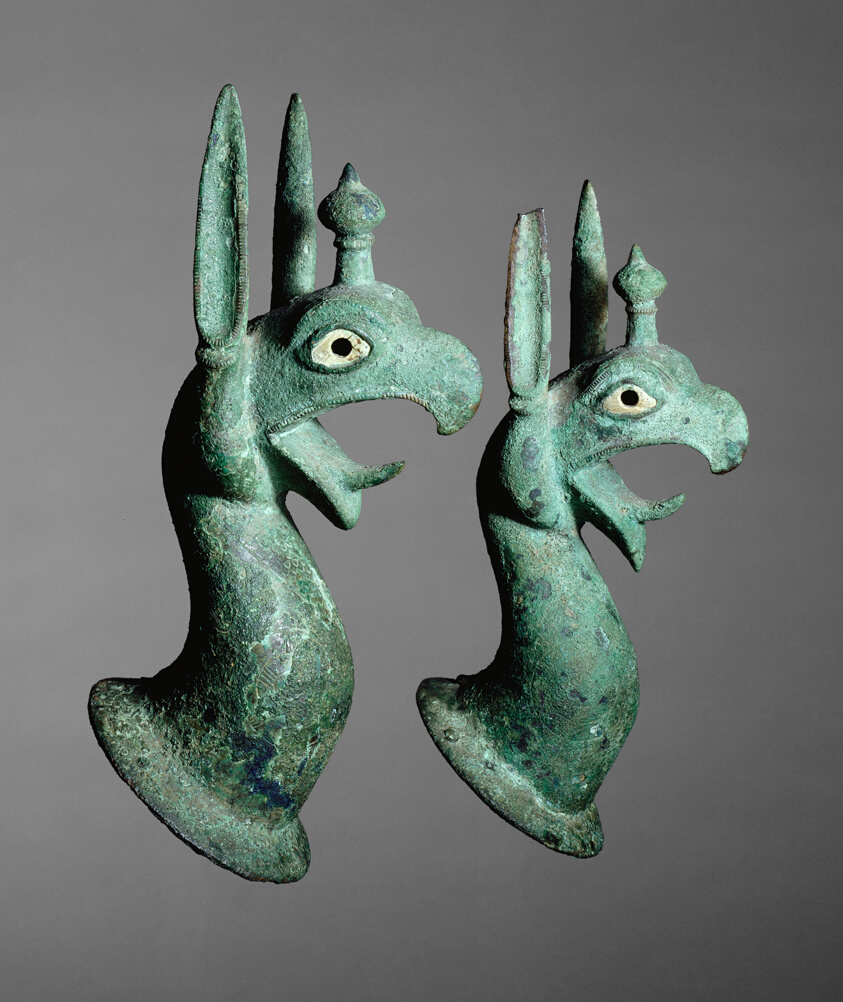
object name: Sculpture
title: Pair of Protomes Depicting the Forepart of a Griffin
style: orientalizing, ancient, greek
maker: Greek; probably Samos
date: 625-575 BCE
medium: Bronze with bone or ivory inlay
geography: Sámos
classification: sculpture; bronze; metal; ancient art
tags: mythology, animals